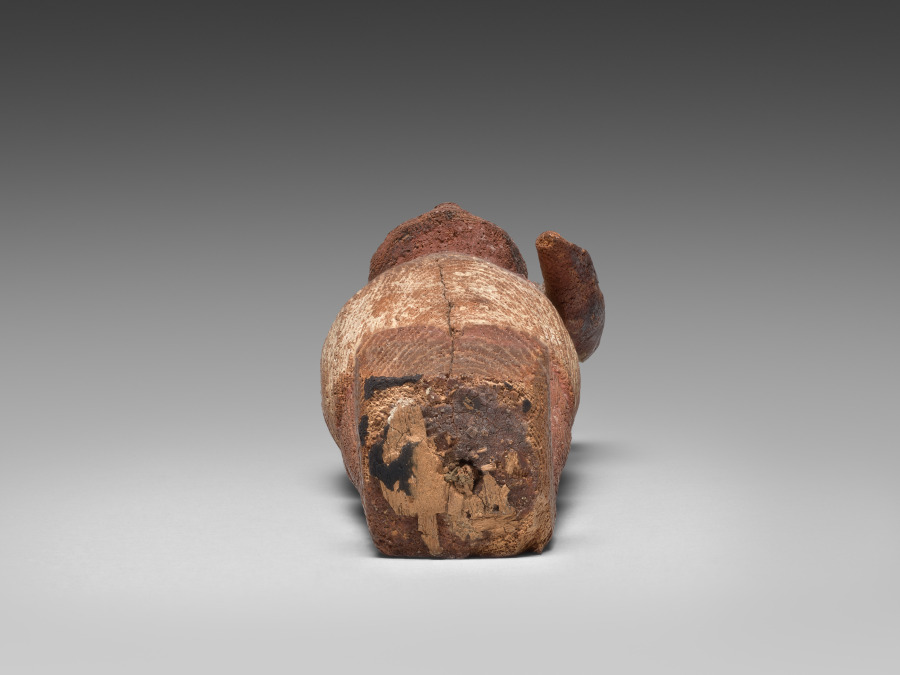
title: Model Figure of a Man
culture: Egypt, Middle Kingdom (2040–1648 BCE), Dynasty 12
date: 1980–1801 BCE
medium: painted wood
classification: Funerary Equipment